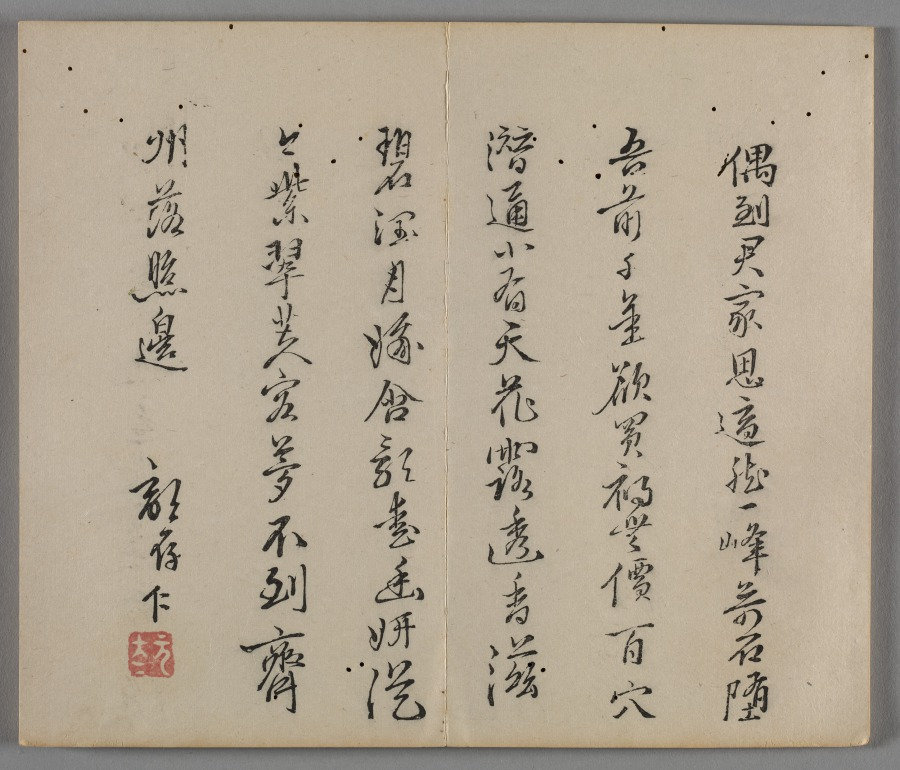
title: Ten Bamboo Studio Painting and Calligraphy Handbook (Shizhuzhai shuhua pu): Rocks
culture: China, Qing dynasty (1644-1911)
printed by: Hu Zhengyan (Chinese, c. 1584–1674)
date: 1633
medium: Woodblock-printed book; ink and colors on paper; first edition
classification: Print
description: Color printing reached a level of perfection in the early 1600s, as seen in this Ten Bamboo Studio Collection of Calligraphy and Painting and the Mustard Seed Garden Manual of Painting (printed 1679 and 1701). The painterly quality, precision in registering (aligning) the woodblocks, and harmonious colors made them the most successful color print editions in Chinese history. Both editions were printed and compiled in Nanjing, spread nationwide, and had a great impact on the arts in Japan and Korea.